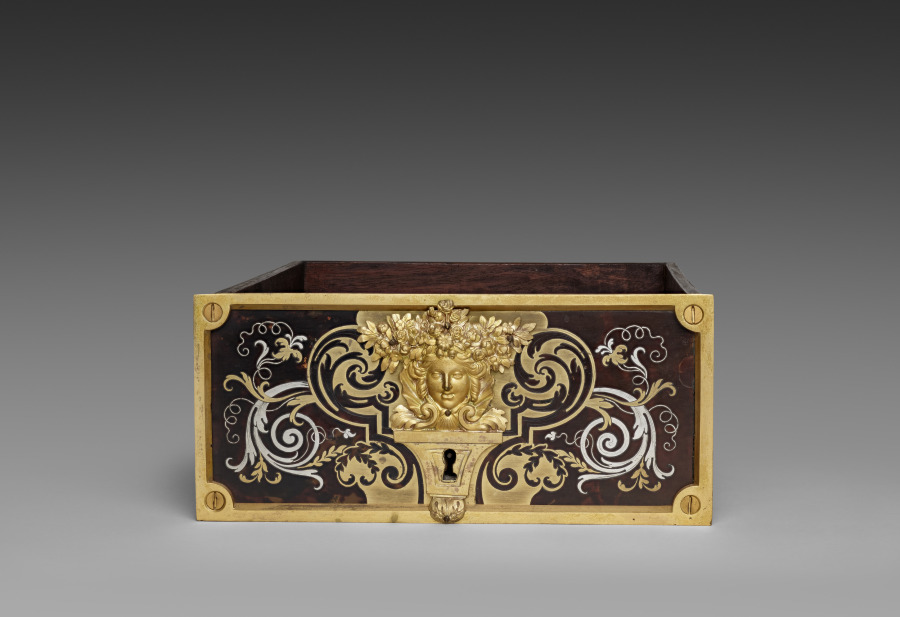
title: Side Drawer for Cabinet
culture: France, late 17th Century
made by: André-Charles Boulle (French, 1642–1732)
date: c. 1690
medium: ebony, marquetry in metal and tortoise shell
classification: Furniture and woodwork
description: Appointed cabinetmaker to King Louis XIV in 1672, André-Charles Boulle became a master of furniture making in France during the late 1600s until his death in 1732. Known primarily for his use of marquetry, in which metal patterns are inlaid into tortoiseshell then applied within the veneered surface of the furniture, Boulle established a level of quality and craftsmanship few others could achieve. As a result, his work found favor at the royal court and among other aristocrats and diplomats eager to impress the king. The inclusion of a medallion depicting Louis XIV within the bronze decoration of this chest would have identified the owner with the royal court. Often exhibiting stout architectural proportions with elegant groups of inlaid motifs such as the parrot on the central panel of this chest, Boulle’s designs are an example of the intellectual fashion for contrasting ideas, materials, and motifs.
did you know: Originally designed to sit atop an elaborate tall stand, this chest was likely altered in the late 1700s to reduce its scale and height.